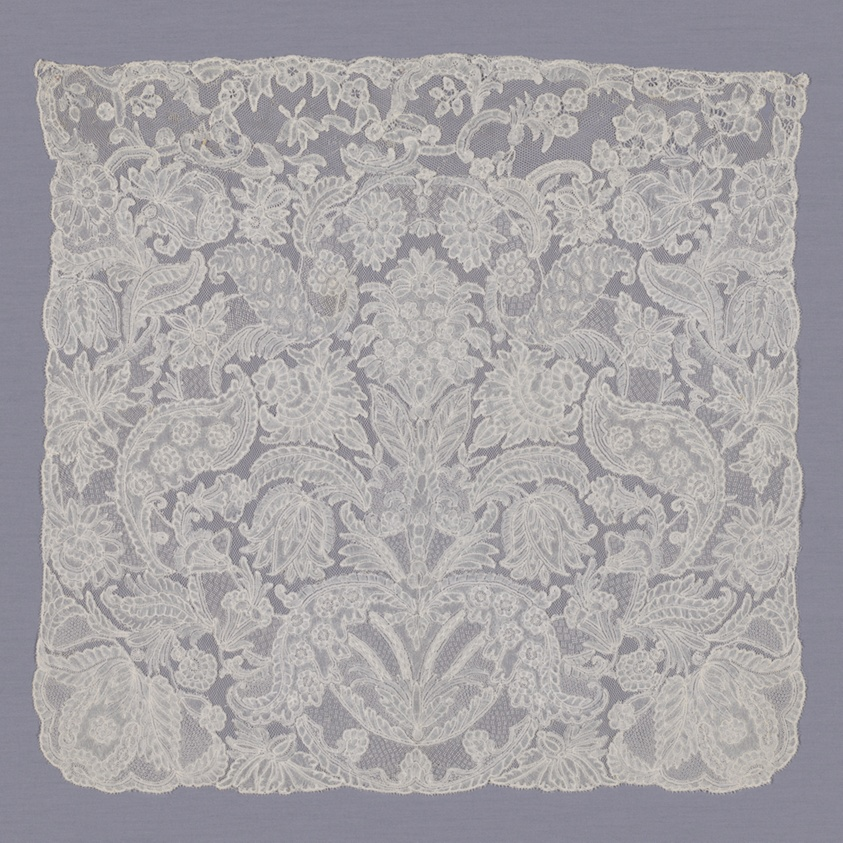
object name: Textile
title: Cravat End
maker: Belgium, Flanders, Brussels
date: 1730s/40s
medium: Linen, bobbin part lace of a type known as "Brussels" with a Droschel mesh ground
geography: Flanders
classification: textile; lace - bobbin; lace